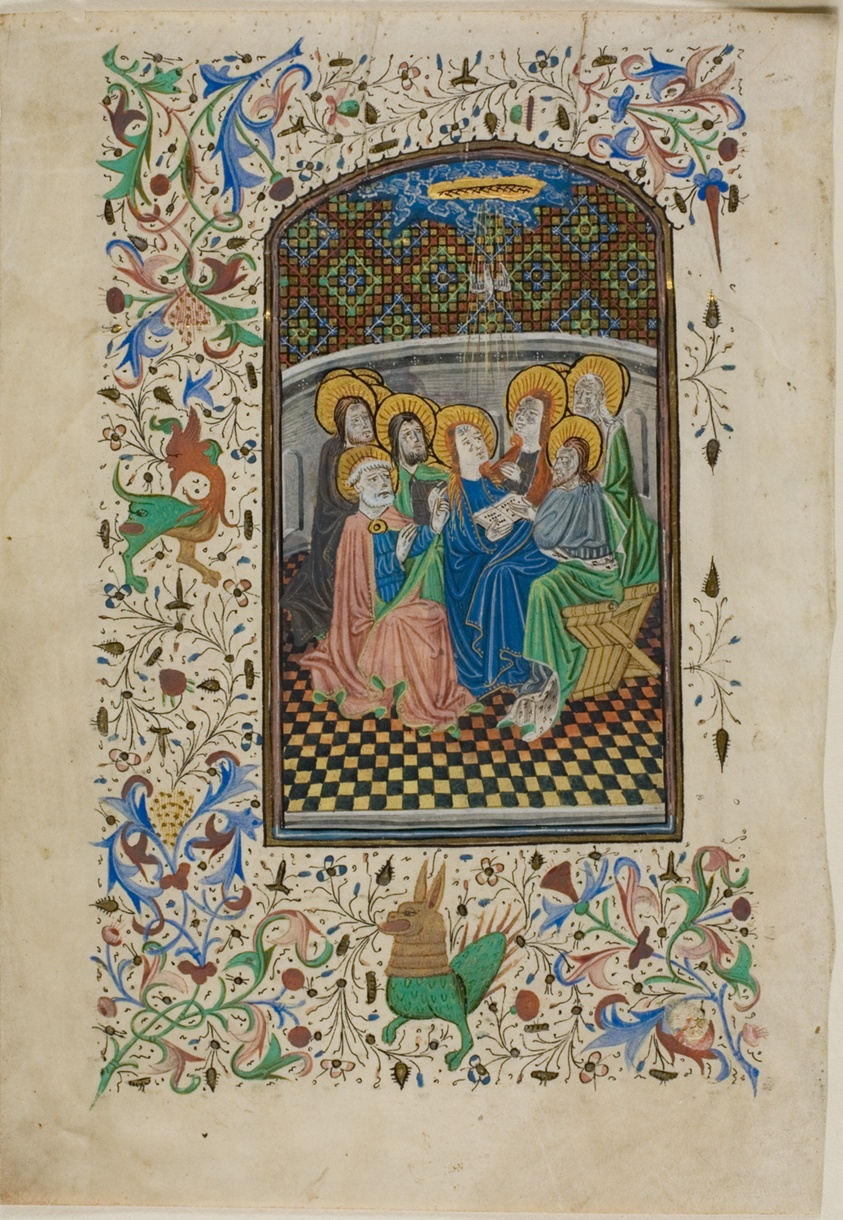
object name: Drawing and Watercolor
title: The Pentecost, from a Book of Hours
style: medieval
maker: French (possibly Loire Valley)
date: c. 1430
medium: Manuscript cutting with tempera and gold leaf, and pen and black ink, on parchment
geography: France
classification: tempera; manuscript; drawings (visual works); prints and drawing